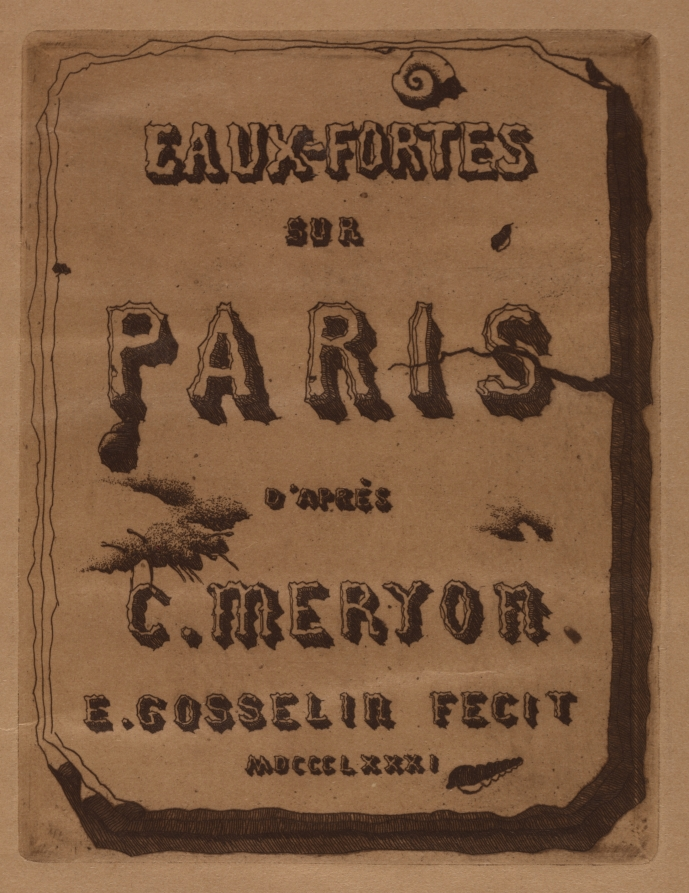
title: Titre des Eaux-fortes sur Paris: Cover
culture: France, 19th century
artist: Edmond Gosselin (French)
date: 1871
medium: etching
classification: Print